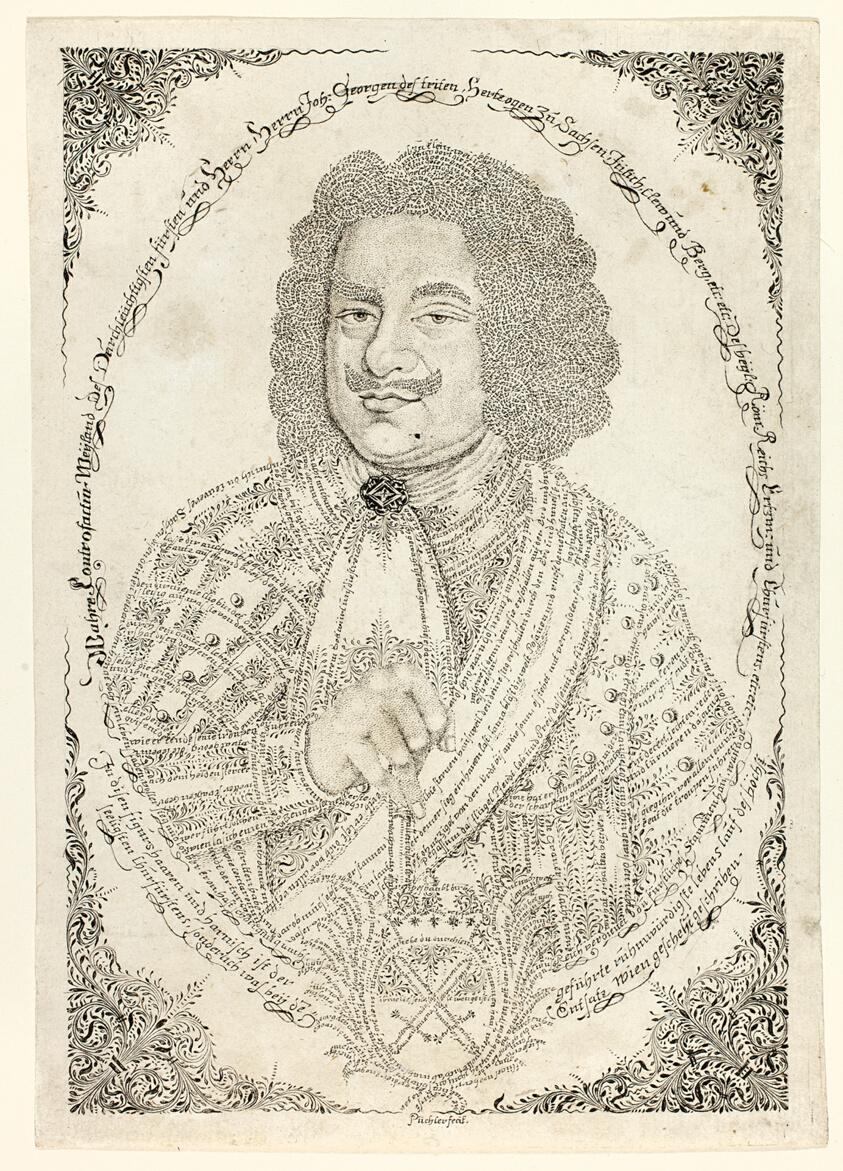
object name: Print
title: Johann Georg III, Elector of Saxony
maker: Johann Michael Püchler (German, active 1679-1709)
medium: Engraving in black on ivory laid paper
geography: Germany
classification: engraving; print; prints and drawing